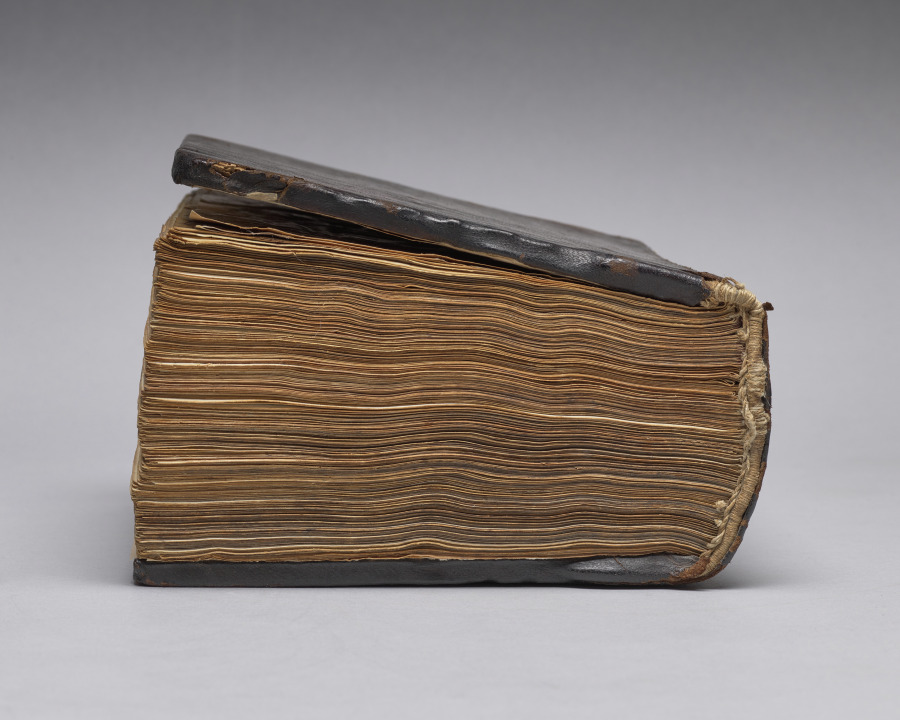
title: Gospel Book with Commentaries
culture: Byzantium, Constantinople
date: c. 1000–1100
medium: ink, tempera, and gold on vellum; leather binding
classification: Bound Volume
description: Each of the four Gospels in this book opens on a page with brilliantly illuminated borders depicting the author of the text as well as birds—principally peacocks, symbols of the immortality of the soul— and fountains, representing the fountain of life and the salvation of the soul. This volume consists of 428 leaves with texts in Greek. Its high level of sophistication is characteristic of monasteries in Constantinople.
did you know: Gospel Books were carried in procession through Byzantine churches.